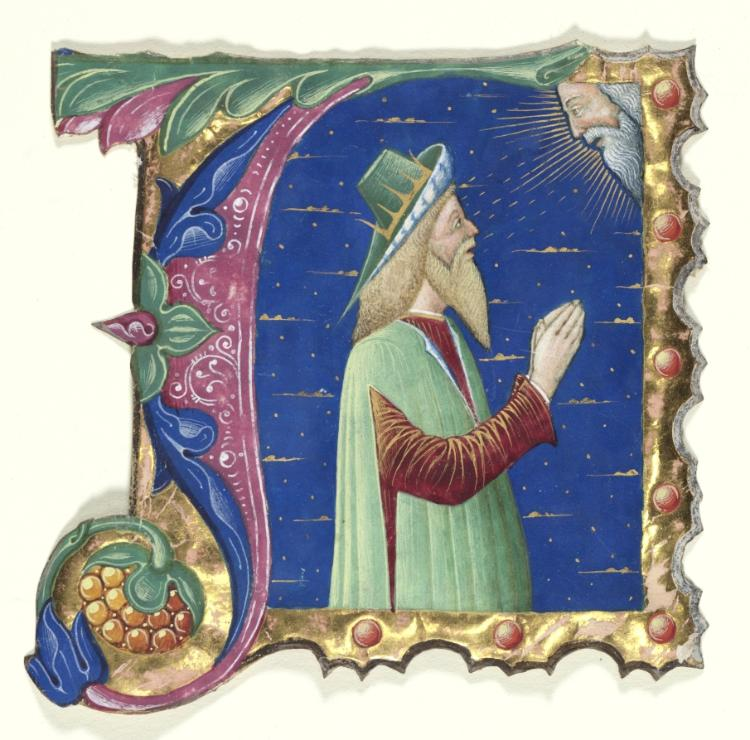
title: Initial A from a Choral Book with King David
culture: Italy, Ferrara, 15th century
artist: attributed to Guglielmo Giraldi del Magri [or del Magro] (Italian)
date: c. 1470–1480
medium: ink, tempera and gold leaf on vellum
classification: Manuscript